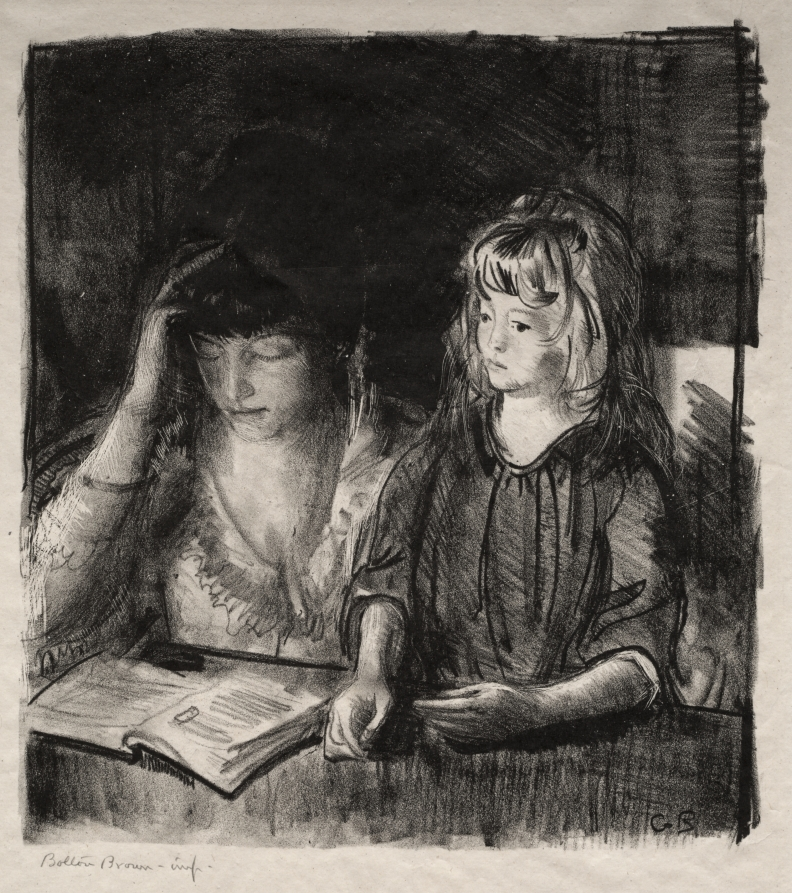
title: Mrs. Bellows Reading to Her Daughter Anne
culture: America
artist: George Bellows (American, 1882–1925)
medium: lithograph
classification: Print